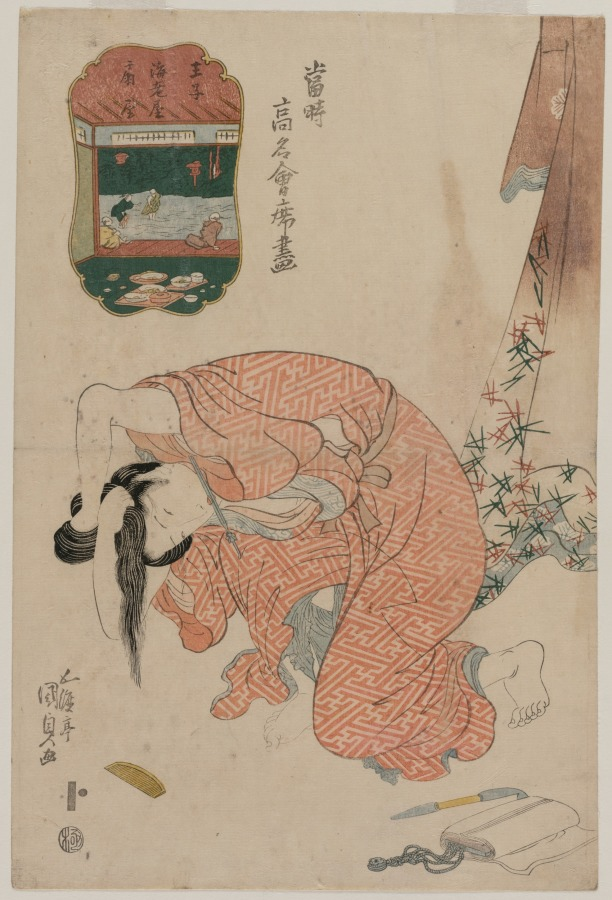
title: Woman Tying Her Hair (from the series Famous Restaurants of the Present Day)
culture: Japan, Edo period (1615–1868)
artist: Utagawa Kunisada (Japanese, 1786–1865)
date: c. early 1820s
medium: color woodblock print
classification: Print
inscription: Signature: Gototei Kunisada ga Publisher: Yamaguchiya Tobei (emblem) Censorship Seal: kiwame